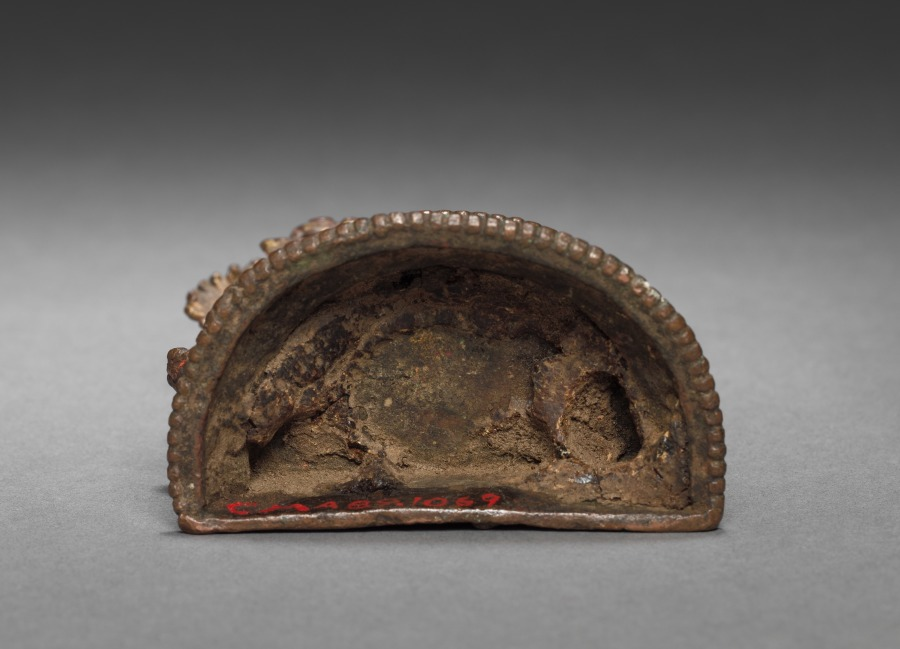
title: Achala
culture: Nepal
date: 1500s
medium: brass or bronze; turquoise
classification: Sculpture